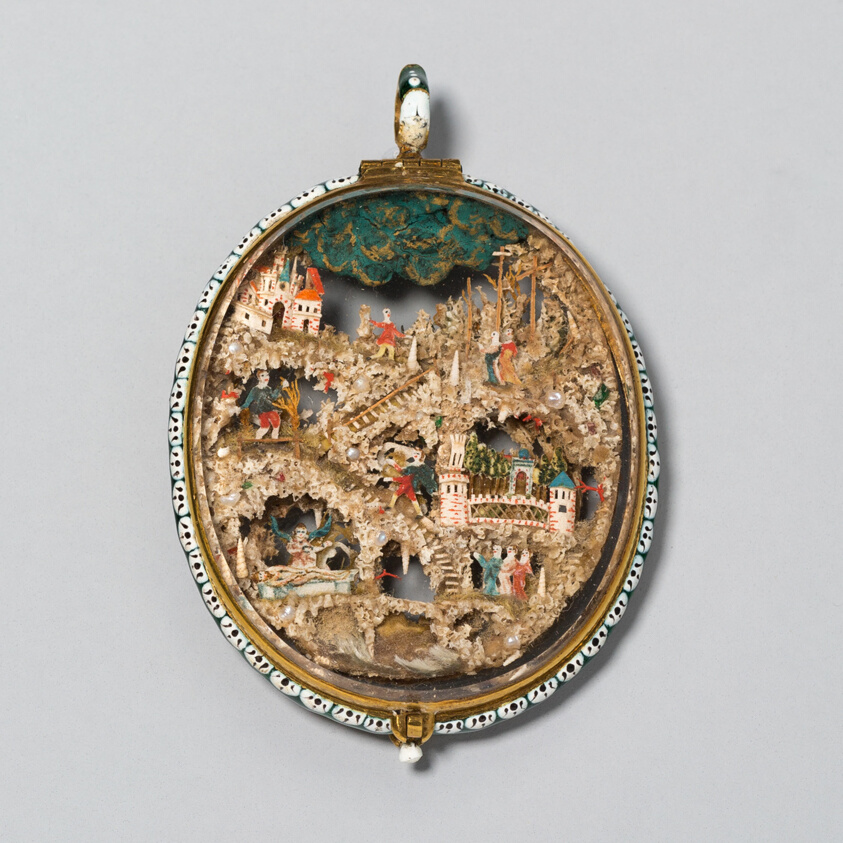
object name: Costume and Accessories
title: Double-Sided Pendant with Scenes from the Lives of Saint Francis and of Christ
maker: German or Austrian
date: 17th century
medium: Gold, enamel, antler core, glass, silk, shell, pearl, paper, and wood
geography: Austria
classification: pendant (jewelry); jewelry; european decorative arts; costume